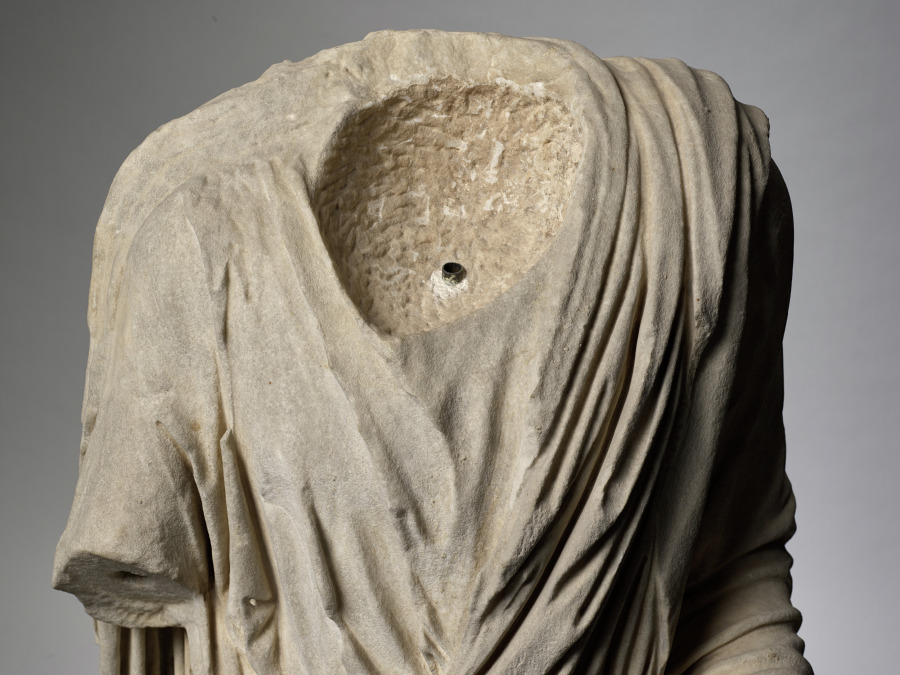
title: Togatus Figure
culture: Italy, Roman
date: 1–200 CE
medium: pentelic marble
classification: Sculpture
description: From 1929 until 1973, this toga-clad body was displayed with a portrait head of Vespasian (recarved from Nero) that did not originally belong to it. Several details indicate a mismatch: the surfaces and proportions differ, and the head projected awkwardly forward even after modern recarving of the neck to fit into the body cavity. Aspects of the toga also suggest that it was sculpted later than the head.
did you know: This body once included a separately made head and arms.